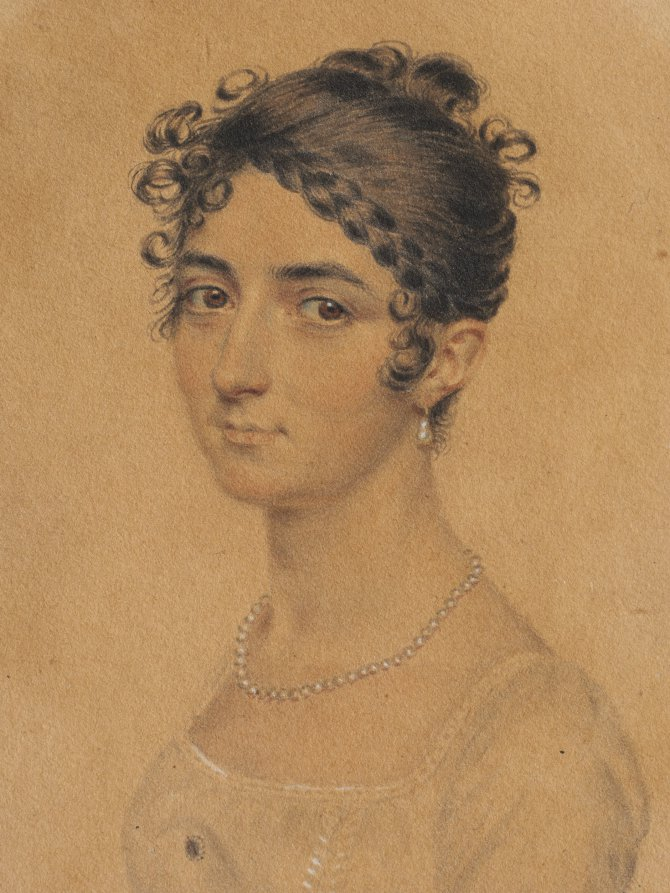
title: Portrait of Miss Mary Tadman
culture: England, 18th century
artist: John I Smart (British, 1741–1811)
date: 1809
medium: watercolor and graphite, heightened with traces of white gouache on paper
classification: Portrait Miniature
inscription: signed, lower right, in gray watercolor: John Smart pinxit / Novr. 1809 ; by artist, lower left, in gray watercolor: Miss Mary Tadman ; VERSO, upper left, in graphite: B/8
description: Mary Tadman’s head and shoulders face right. Her eyes are brown, and she wears a necklace of small pearls and a drop pearl earring. She wears her dark brown hair high in a classically inspired bun, with a braid across the hairline and many curls falling over her forehead and in front of her ears. Her white dress is delicately embroidered at the edges along the bust and is tied at the empire style waist, with a small pin fastened to the front. The translucent white sleeves worn beneath the dress are probably made of muslin and detachable, since they do not appear in the ivory version of the portrait. Detachable sleeves were popular during the late eighteenth and early nineteenth centuries and enabled a dress to function as day- and eveningwear. The nature of this work as a finished drawing rather than exclusively a preparatory sketch for a miniature on ivory is evident in the degree of finish of the sitter’s clothing, heightened with white gouache and painted to the elaborated penciled oval border. In December 1809, the year this drawing was executed, Mary Tadman (1786–1862) married Major William Jolliffe Eldridge. He died in 1818 in Poona, India, and three years later, his widow married Colonel Daniel Hutchins Bellasis (1785–1836), with whom she had two children: Flora and Augustus Fortunatus. Mary lived for nearly two decades in India, where she was a celebrated beauty, and where her second marriage into the militarily distinguished Bellasis family seems to have secured her presence in high society. On the occasion of her marriage in 1821, she wrote her spinster sister, “I forgot I have not told you a word of my marriage, which by the by was the grandest affair known in Bombay, I am almost tired of the subject—visits and congratulations, etc. The Governor and Staff went with me to Church . . . and all the people of any consequence in Bombay about 100 came to a Breakfast at Randall Lodge—since which it has been one constant scene of gaiety. Last week, pity me when I tell you, how I was obliged to exert myself—we gave a dinner party to 40 people. The Governor’s family . . . and all the Big Wigs who gave me parties—the same evening 160 came at ten to a dance—afterwards a supper very splendid I assure you.” A related ivory version of this miniature is in the Fitzwilliam Museum, Cambridge, signed and dated at the lower left: “J S / 1809.” While Miss Tadman’s coiffure, countenance, jewelry, and dress are identical to the Cleveland sketch, in this portrait she wears an elaborate black and red, flowered Indian shawl with white border over her white dress, the under-sleeves omitted. Indian shawls, particularly those from Kashmir, were extremely expensive signifiers of social status in India and Europe, and by the end of the eighteenth century, they often formed part of the trousseau of a wealthy French or English bride. The shawls were particularly fashionable worn in contrast with the high-waisted gauzy white dresses of the Empire period. While many portraits and miniatures from the early nineteenth century depict women conspicuously displaying their Indian shawls, Miss Tadman wears hers in a manner not often seen in European portraits: across one shoulder and around the waist, like a sari. Mary and William Eldridge wed in December 1809, one month after Smart signed this sketch. Because Smart depicted Miss Tadman during her engagement, the shawl worn in the finished ivory portrait may have been a gift from her betrothed, who had been stationed in Bombay in 1809. While appropriate for a half-length portrait, the under-sleeves were probably deemed unnecessary for the miniature, which shows little of the arm and instead depicts the sitter more formally, wrapped in her shawl. The existence of a larger, finished drawing as well as a miniature on ivory suggests that the finished drawing may have served a variety of roles, while also implying that another preparatory sketch for both may exist. At nearly twice the size of the ivory, Cleveland’s drawing is not likely to have been the sole preparatory exercise for the finished miniature. There is no question that as a young bride-to-be, Miss Tadman was thinking carefully about how she wished to be represented at a pivotal moment in her life, and that a single portrait was insufficient to accommodate all of the accoutrements that were of significance to her. The neo-Grec coiffure, au courant empire waist dress with detachable sleeves, pearl parure, ornamental pin, and costly shawl communicate clearly the social ambitions to which her biography is also a testament.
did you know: This drawing was passed on through the generations of the artist John Smart's family until 1937 when his great-granddaughter sold it.